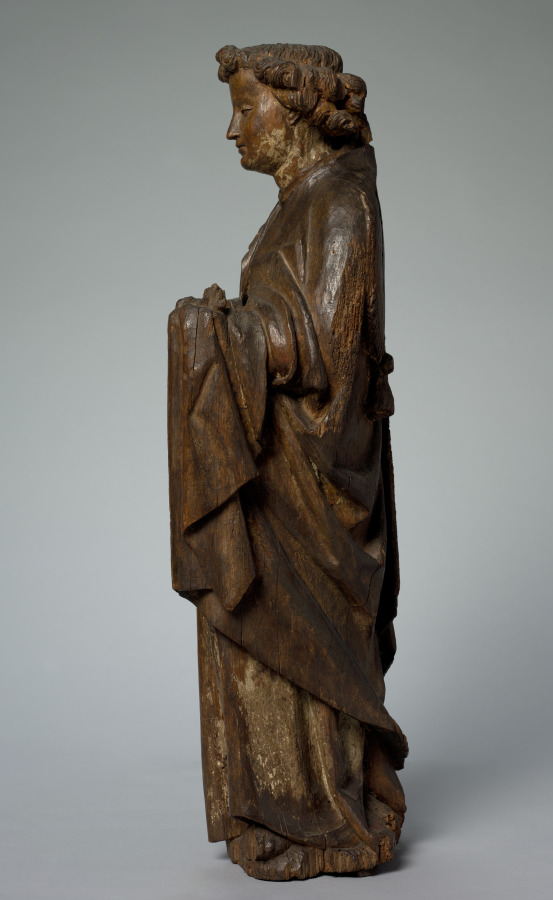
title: Angel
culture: Bruges?, Belgium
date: c. 1430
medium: oak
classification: Sculpture